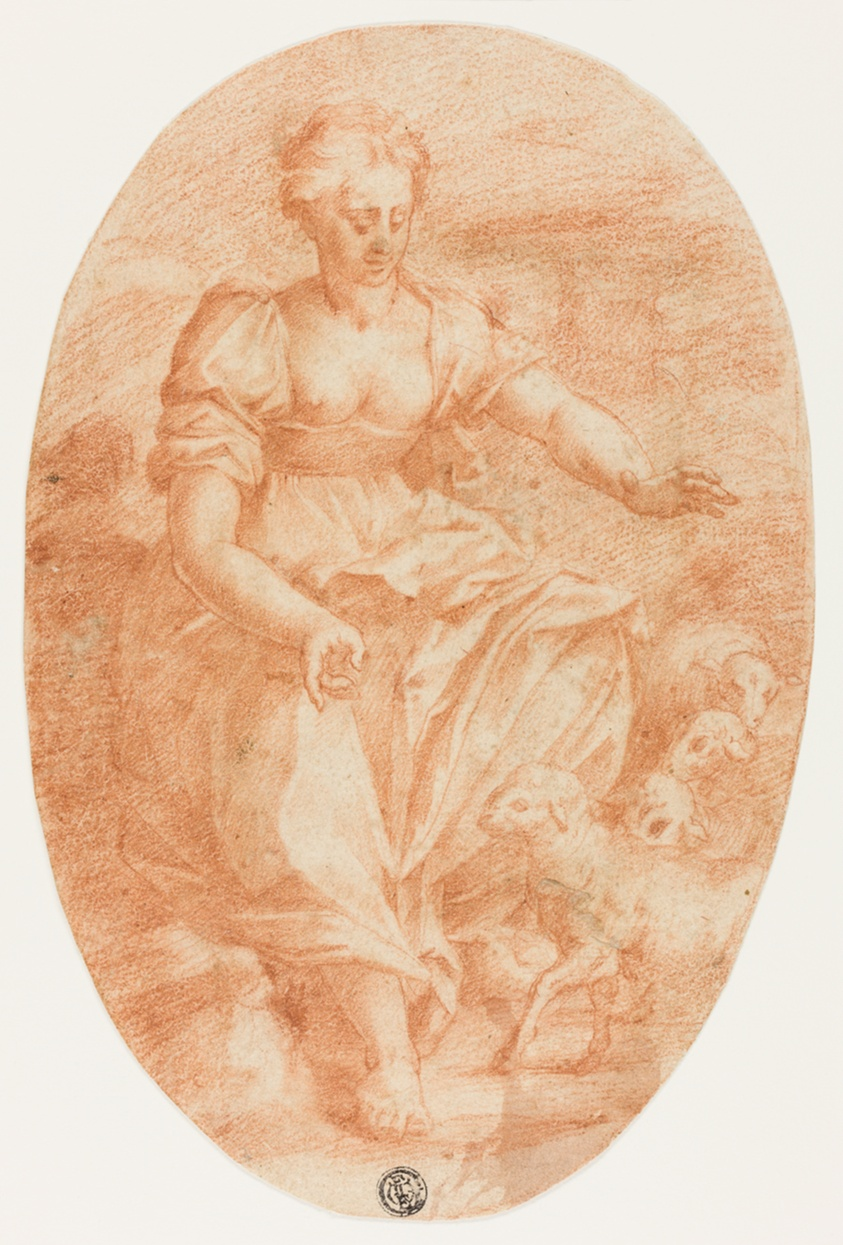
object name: Drawing and Watercolor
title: Allegorical Figure of Meekness or Saint Agnes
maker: Follower of Rosso Fiorentino; Italian, 1494-1540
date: 1545/50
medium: Red chalk on oval-shaped ivory laid paper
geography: Italy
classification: chalk; drawings (visual works); prints and drawing